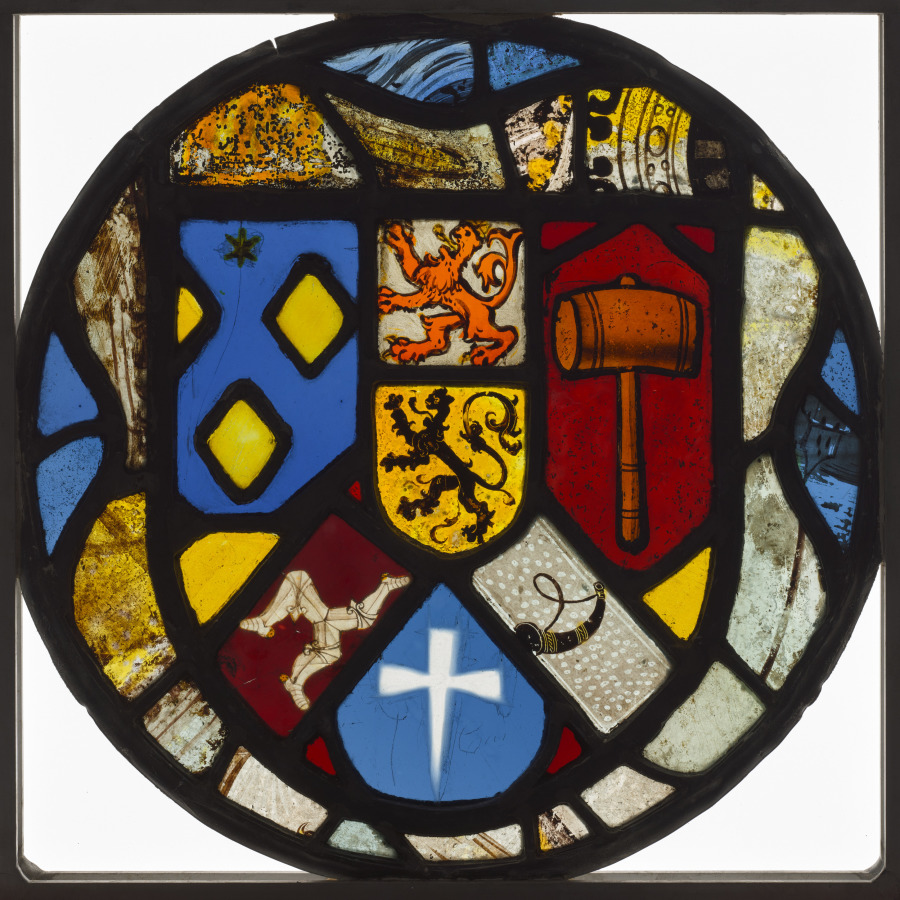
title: Heraldic Roundel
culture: England, 16th century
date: 1500s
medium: pot-metal and white glass, silver stain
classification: Glass